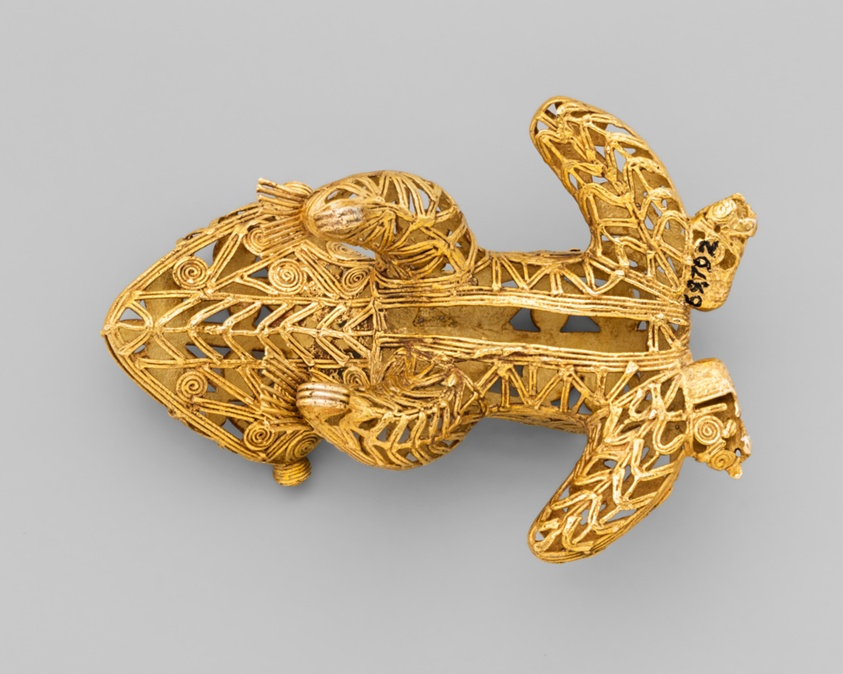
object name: Costume and Accessories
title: Filagree Pendant in the Form of a Frog or Toad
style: coclé, Pre-Columbian, americas, venado beach, lower central america, Arts of the Americas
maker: Coclé (Venado Beach, Coclé province, Panama)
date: 500–1000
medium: Cast gold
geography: Venado Beach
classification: jewelry; pendant (jewelry); metal; art of the americas; costume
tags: frog, animals